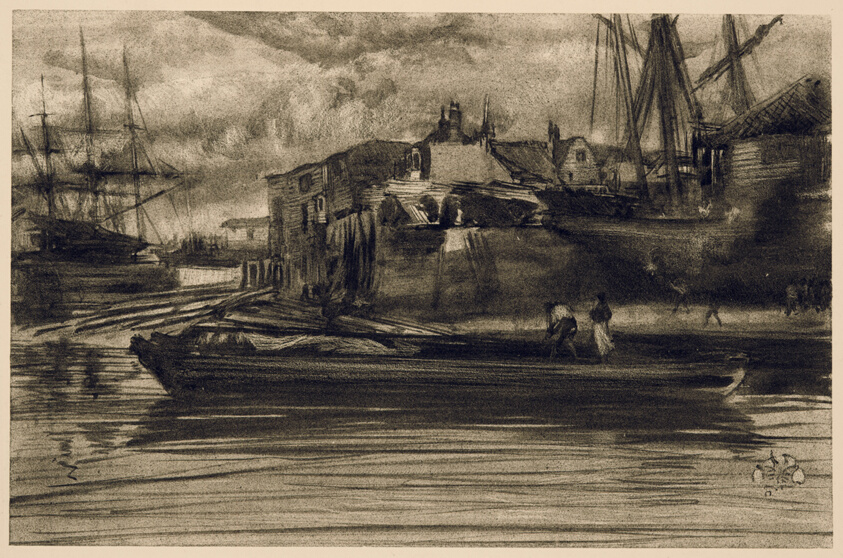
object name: Print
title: Limehouse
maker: James McNeill Whistler (American, 1834-1903)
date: 1878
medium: Lithotint in black ink with scraping and incising, on a prepared half-tint ground, on off-white plate paper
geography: United States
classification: lithotint; lithograph; print; prints and drawing; paper